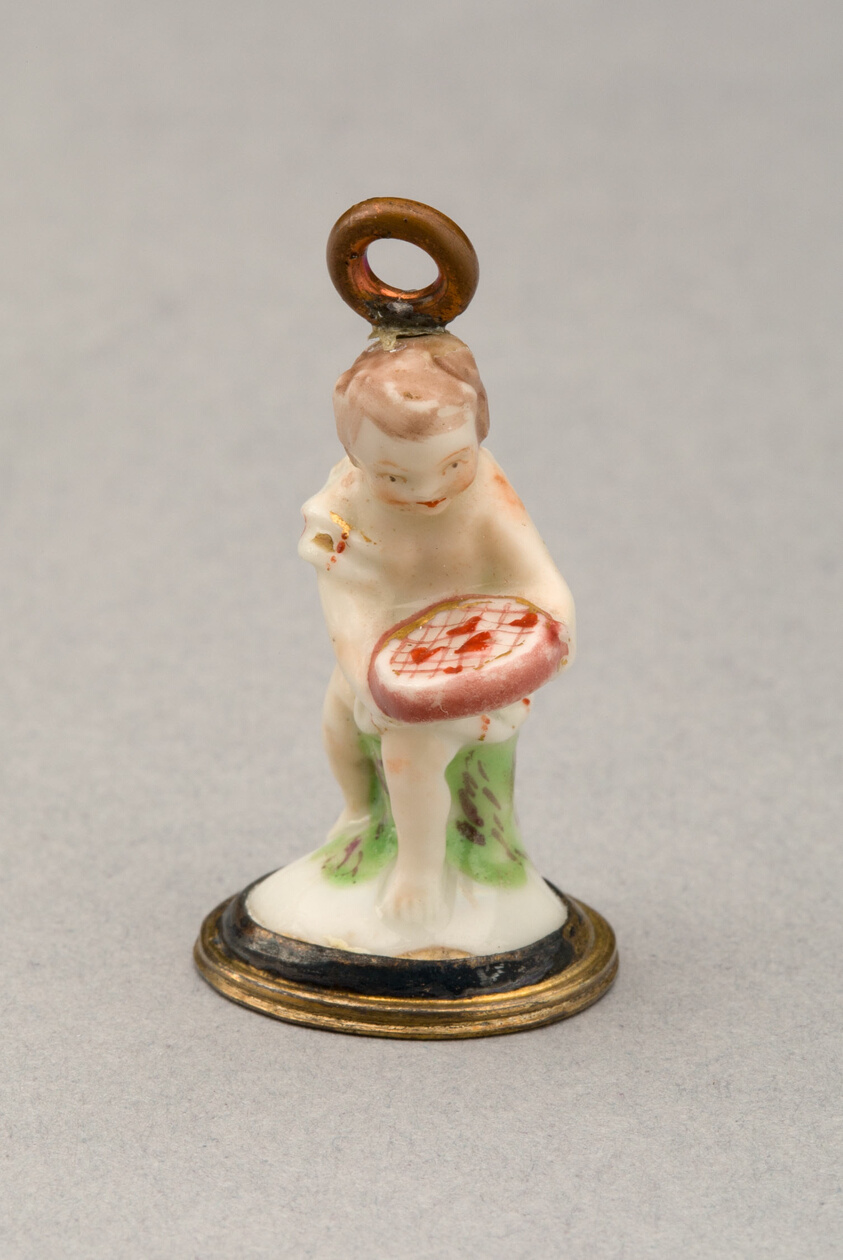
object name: Ceramics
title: Seal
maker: Chelsea Porcelain Manufactory; London, England, c. 1745-1784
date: 1750/70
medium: Soft-paste porcelain, polychrome enamels and gilding; hardstone and metal mount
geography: Chelsea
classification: porcelain; ceramics; european decorative arts